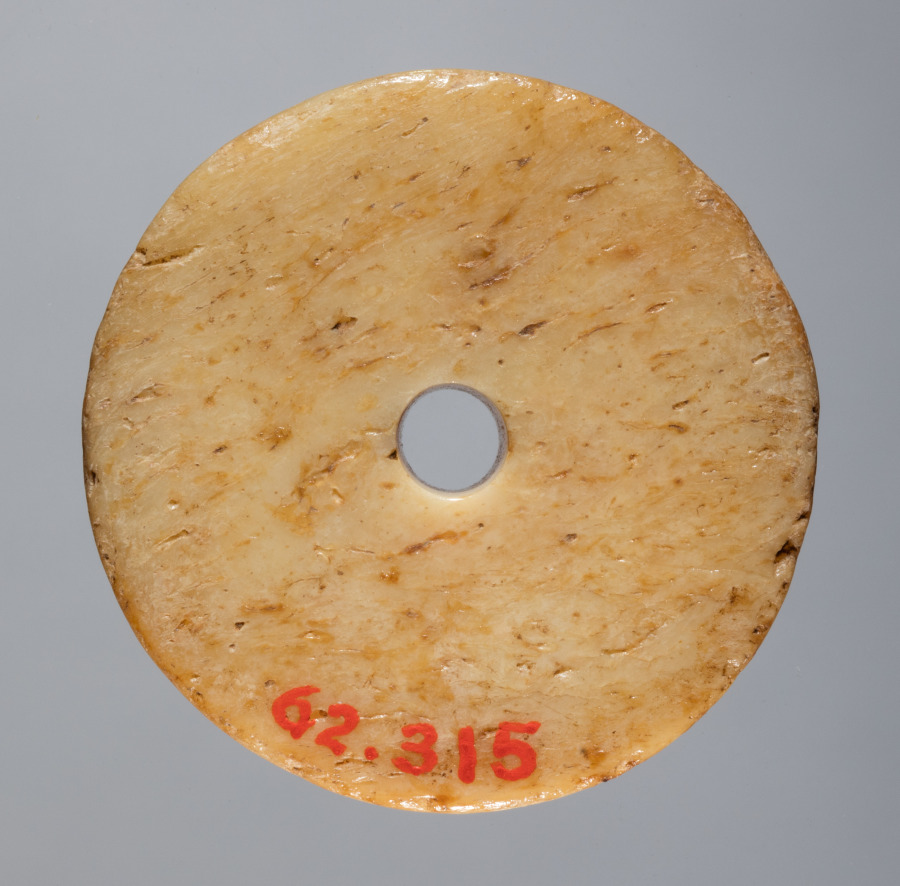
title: Spindle Whorl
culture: Iran, early Islamic period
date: 700s - 900s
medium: bone, incised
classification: Spindle Whorl